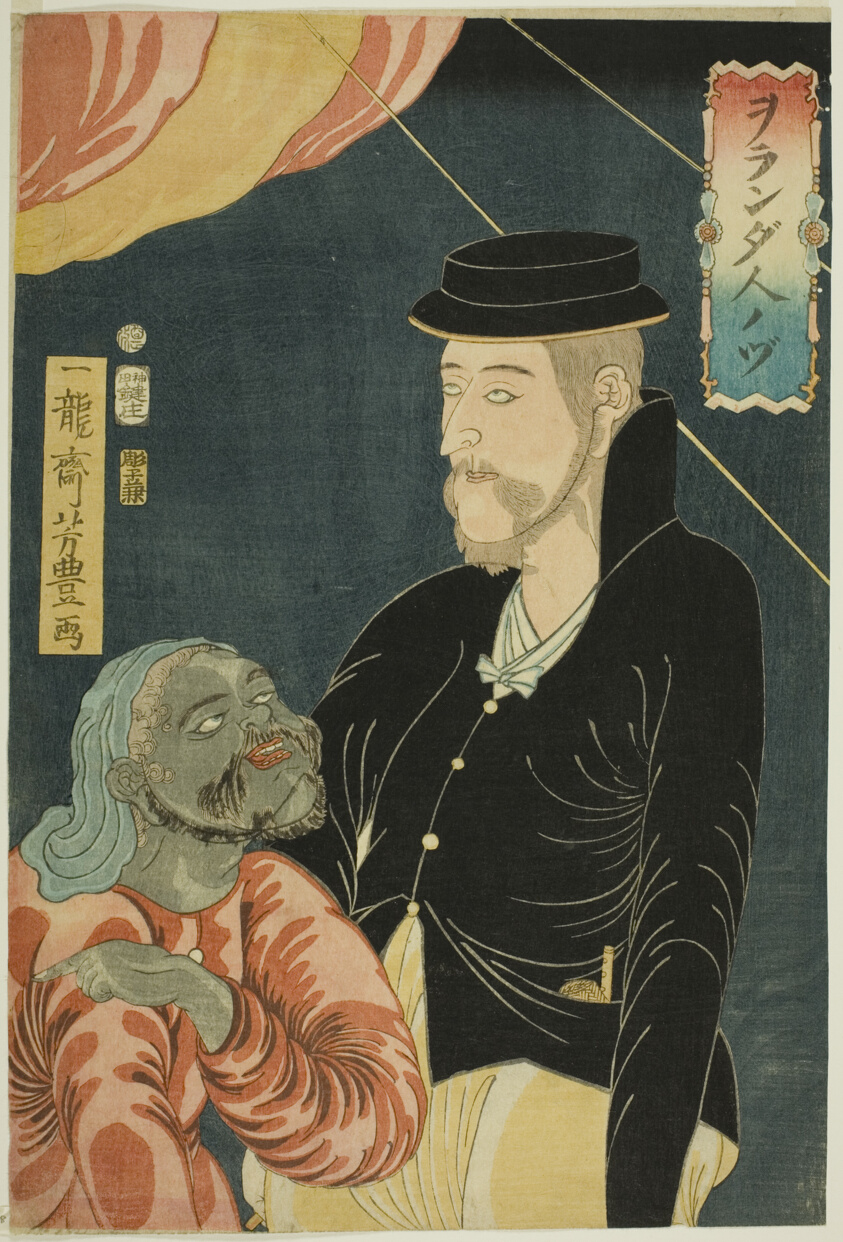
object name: Print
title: Illustration of a Dutchman (Orandajin no zu)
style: Japanese (culture or style)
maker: Utagawa Yoshitoyo (Japanese, 1830–1866)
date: 1861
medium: Color woodblock print; oban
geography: Japan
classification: woodblock print; print; asian art